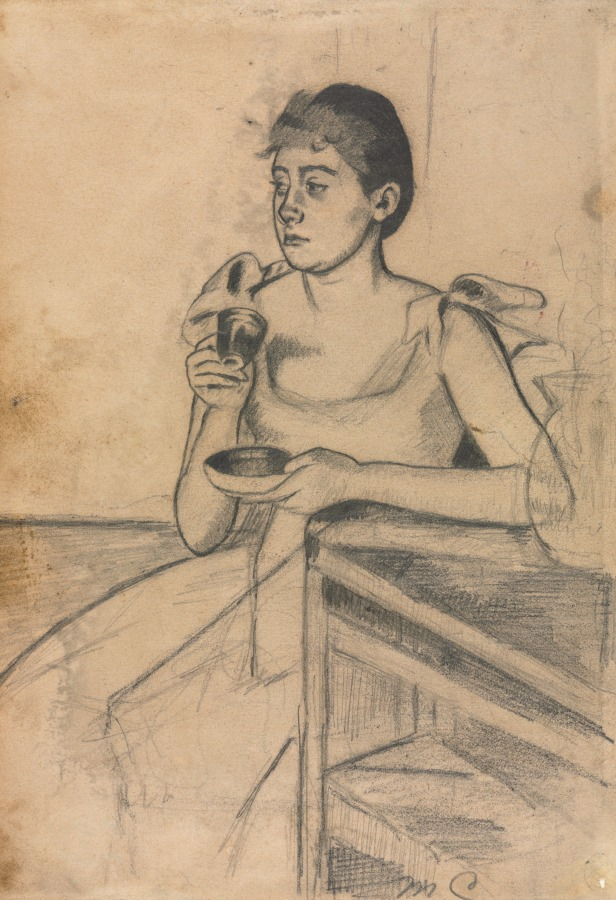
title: After-Dinner Coffee (recto); After-Dinner Coffee (verso)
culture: America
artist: Mary Cassatt (American, 1844–1926)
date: c. 1889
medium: graphite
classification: Drawing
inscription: inscribed in graphite, lower right: "M. C."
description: Cassatt exhibited prints for the first time in 1880 at the fifth Impressionist exhibition. As the decade progressed, she continued to show her graphic work alongside pastels and paintings. In the spring of 1890, at the Deuxième Exposition de Peintres-Graveurs, she showed a group of drypoints, remarkable in their delicacy and precision, as well as a group of prints made with a combination of aquatint and softground etching that appeared quickly drawn and spontaneous. After-Dinner Coffee is a study for a softground etching with aquatint.